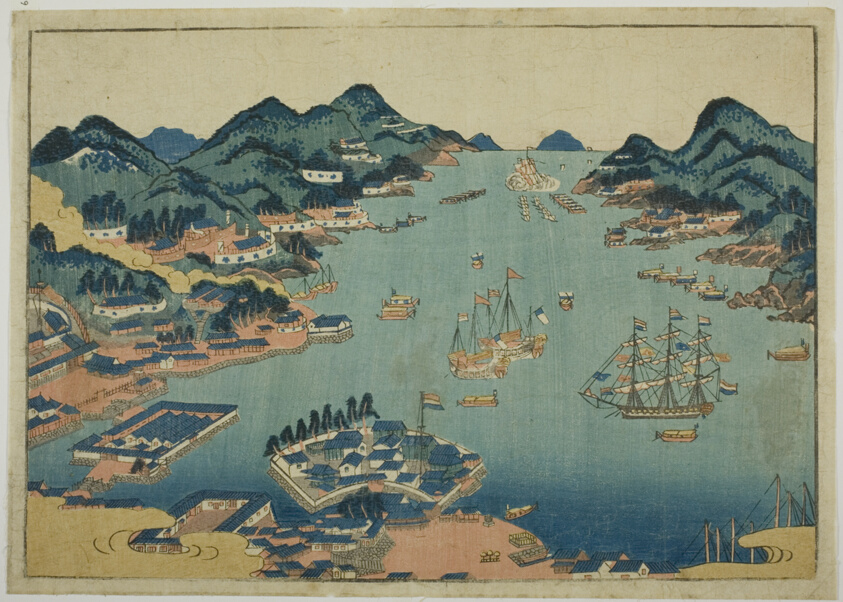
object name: Print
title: Nagasaki Harbor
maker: Unknown Artist (Japanese, date unknown)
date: 1810s-1830s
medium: Color woodblock print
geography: Japan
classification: woodblock print; print; asian art